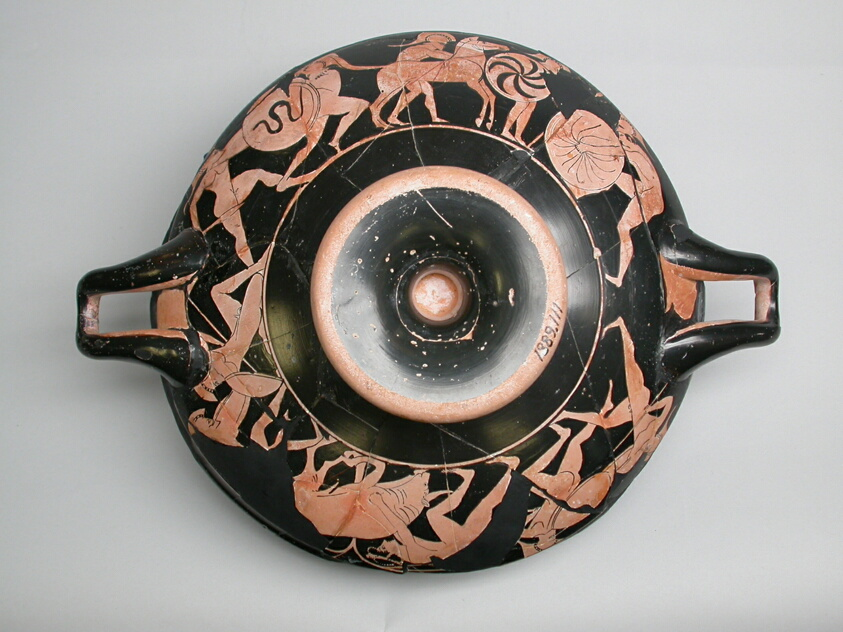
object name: Vessel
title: Kylix (Drinking Cup)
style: attic, red-figure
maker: Manner of the Epeleios Painter; Greek; Athens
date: 510-500 BCE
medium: terracotta, red-figure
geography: Attica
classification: drinking vessel; earthenware; ceramics; vessel; ancient art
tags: gods (deities), satyr